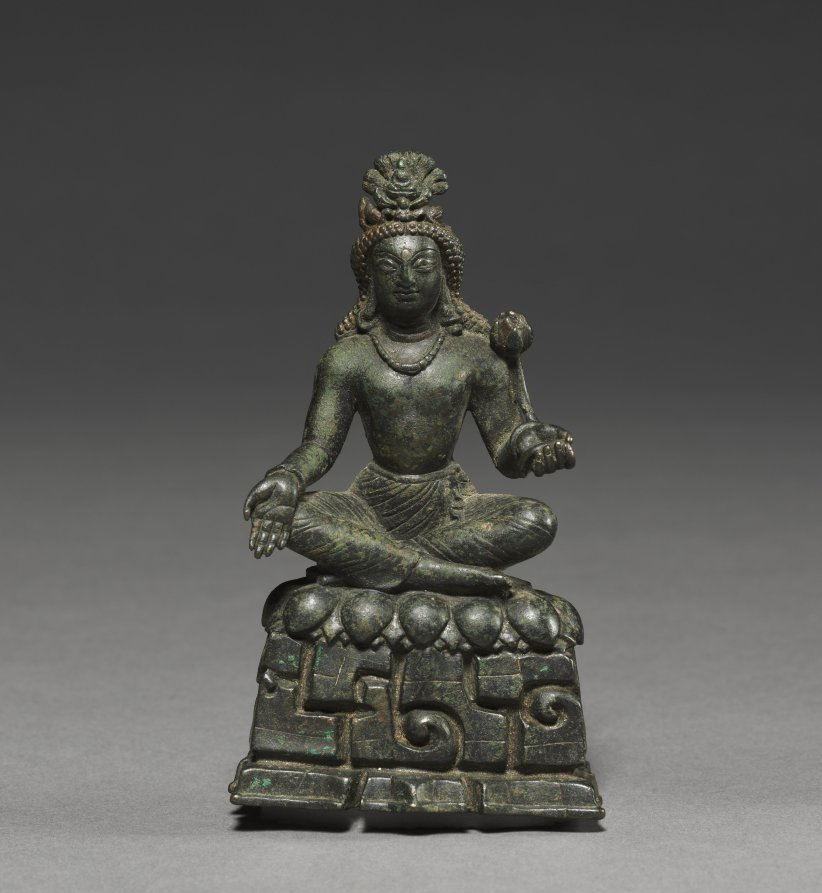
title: Padmapani Lokeshvara Seated on the Rock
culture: India, Kashmir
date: 700s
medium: bronze with silver overlay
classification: Sculpture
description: Though diminutive, this image conveys a monumental power through the intense expression particular to Kashmiri art. He sits alert in yogic concentration on a lotus pedestal that exists miraculously in a rocky wilderness. His left hand holds the stem of a lotus flower—the main attribute of this bodhisattva of compassion. His generously sized right hand with fleshy palm is in the gift-giving gesture. The tiny figure of Amitabha, the Buddha who sits in meditation in his crown, identifies the image as Avalokiteshvara.